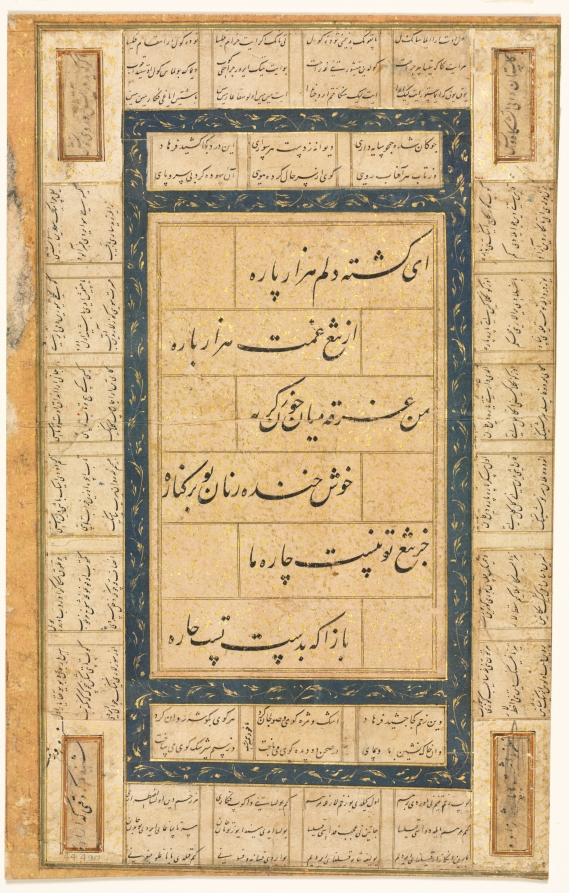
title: Calligraphy, Persian Verses (verso)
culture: Iran, Timurid period (1370-1501)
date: 1400s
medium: Opaque watercolor, ink, and gold on paper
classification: Manuscript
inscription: script: Nasta'liq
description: In Persian albums, pages of calligraphy alternated with paintings. These verses have been written in an elegant nastaliq, a cursive form of the Arabic script.